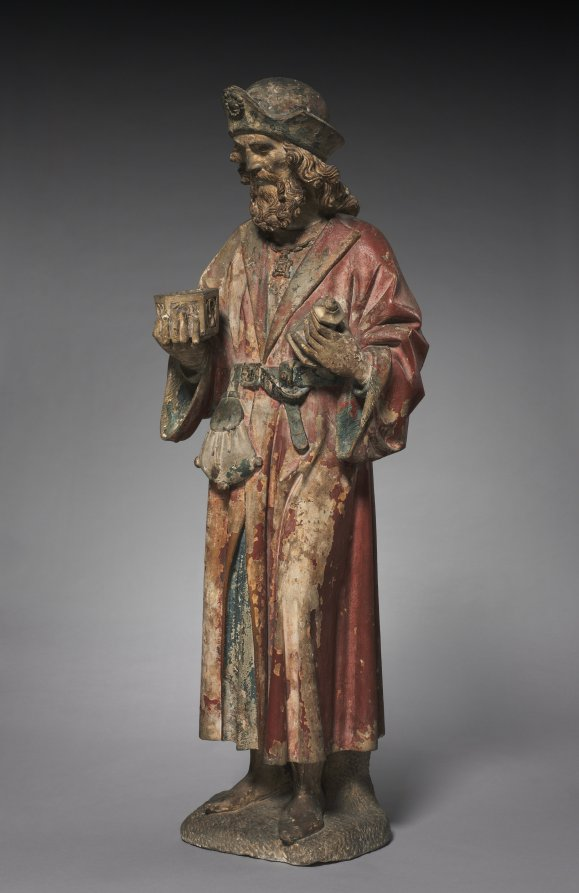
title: Magus from an Adoration Group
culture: France, possibly Champagne, 15th century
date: c. 1460–1475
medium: polychromed limestone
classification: Sculpture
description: This sculpture represents one of the three Magi or kings who witnessed the birth of Jesus. The Magi are identified as Caspar, Melchior, and Balthazar and are typically shown in art bearing their gifts of gold, frankincense, and myrrh. Joseph is often present in these scenes as are shepherds.The single figure shown here was originally part of a sculptural group with many figures. He is shown holding an ornate receptacle with lid. Other figures from the group are not known to have survived, and which Magus the sculpture was intended to represent cannot be clearly established.